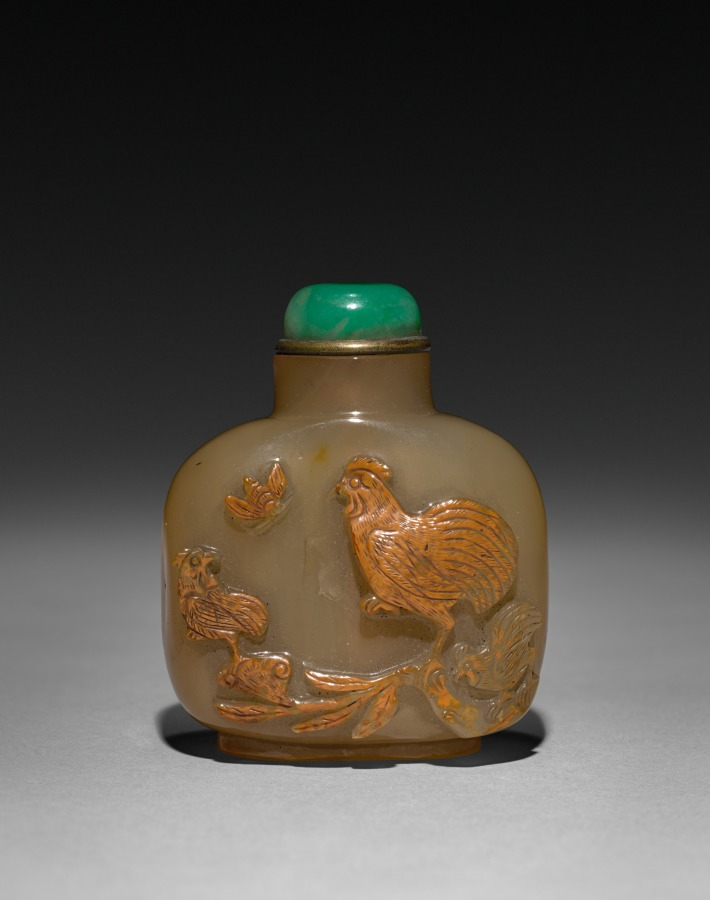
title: Snuff Bottle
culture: China, Qing dynasty (1644-1911)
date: 1644–1911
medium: glass and jade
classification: Glass